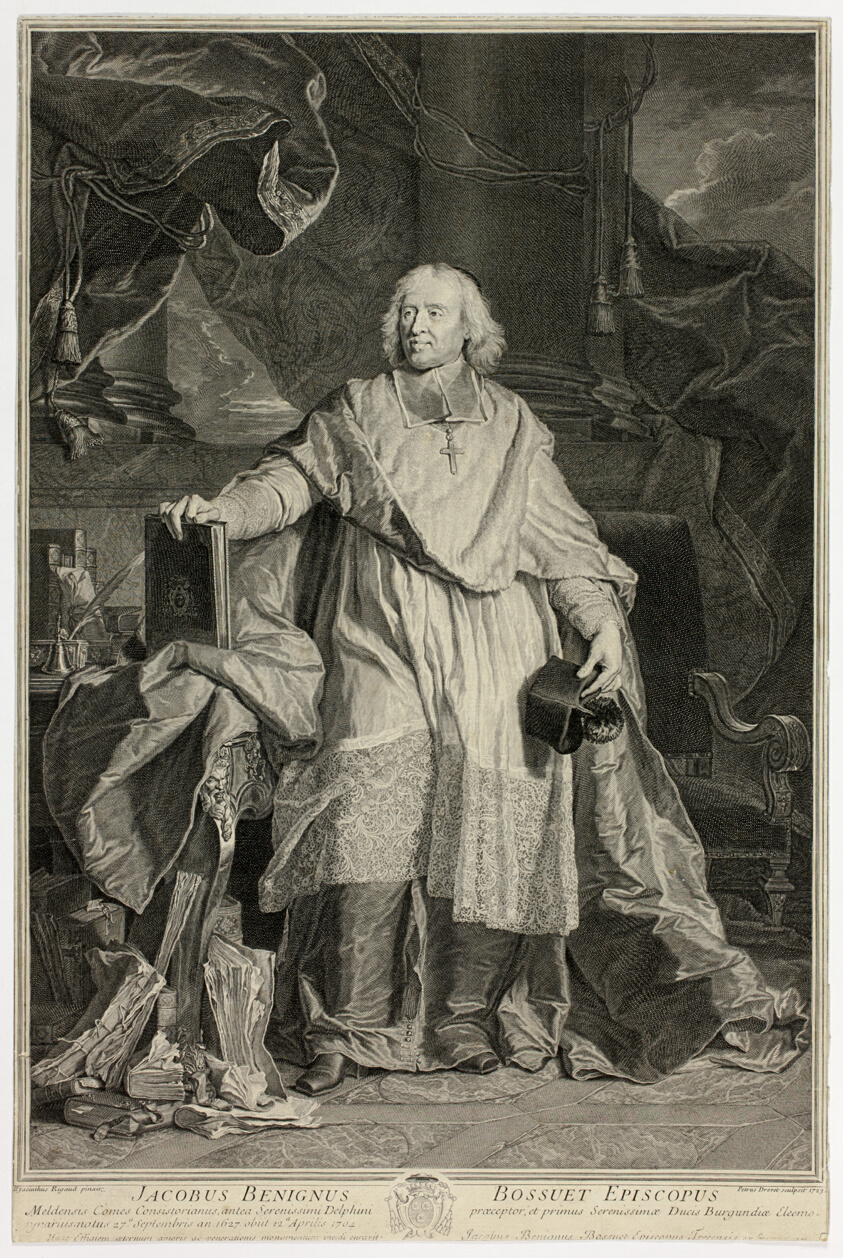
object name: Print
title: Portrait of Jacques Bénigne Bossuet, Bishop of Meaux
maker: Pierre-Imbert Drevet (French, 1697-1739); after Hyacinthe Rigaud (French, 1659-1743)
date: 1723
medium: Engraving on cream laid paper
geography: France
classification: engraving; print; prints and drawing